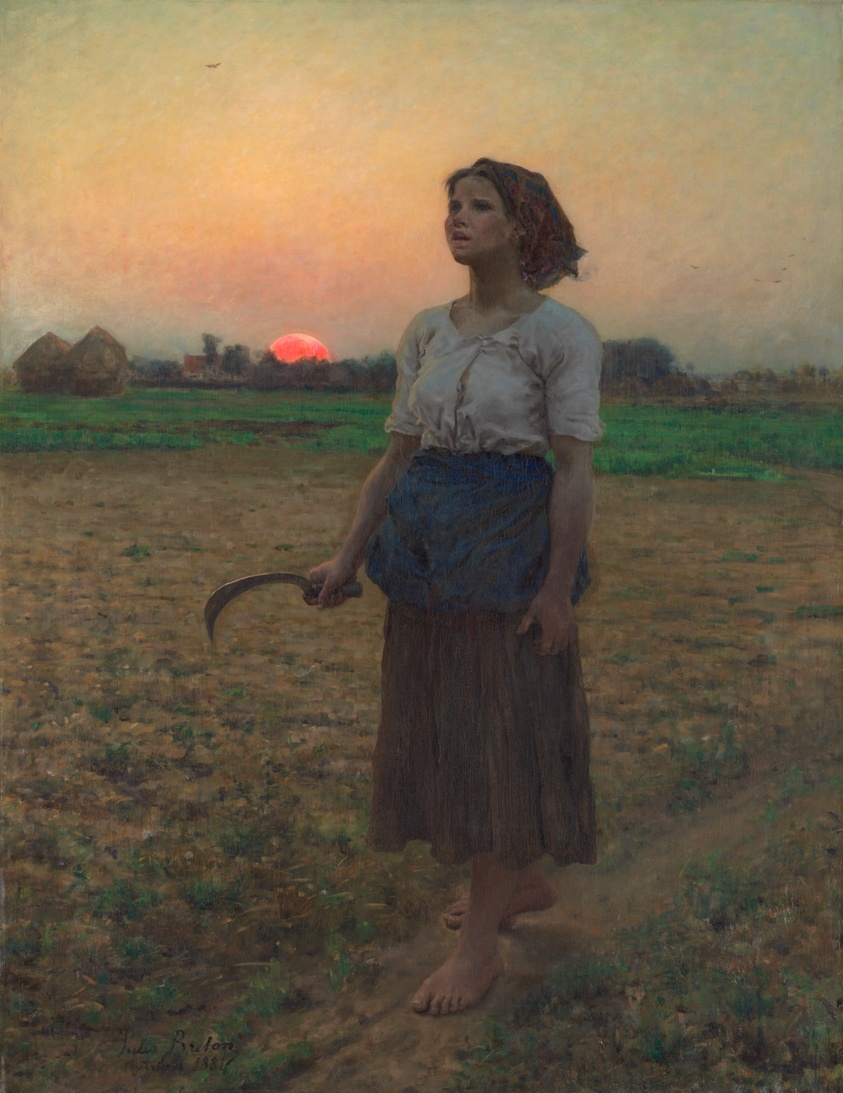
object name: Painting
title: The Song of the Lark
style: 19th century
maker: Jules Breton (French, 1827–1906)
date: 1884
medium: Oil on canvas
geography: France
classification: oil on canvas; french; oil paintings (visual works); paint; painting; european painting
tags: woman, sky, horizon, landscape, rural life, bird, farm, field, girl, labor, peasants, sun, sunrises